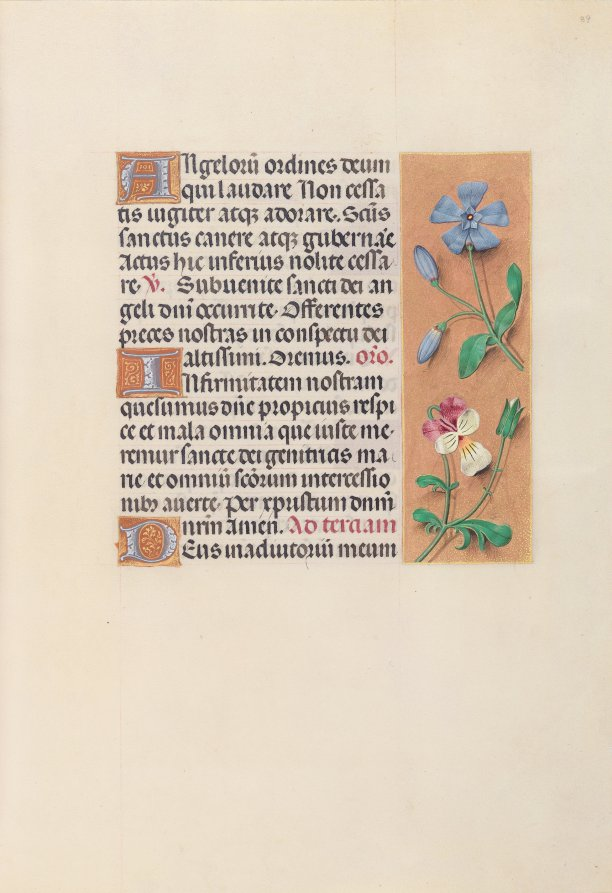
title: Hours of Queen Isabella the Catholic, Queen of Spain: Fol. 39r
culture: Flanders, Ghent and Bruges, late 15th century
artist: Master of the First Prayerbook of Maximillian (Flemish, c. 1444–1519)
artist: and Associates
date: c. 1500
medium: ink, tempera, and gold on vellum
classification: Bound Volume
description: This manuscript was illuminated by a circle of at least five highly organized manuscript painters active in the Flemish cities of Ghent and Bruges. The principal illuminator was Alexander Bening, who painted the majority of the book's miniatures. Manuscripts produced by this circle of artists are renowned for the decoration of their borders, which typically feature a rich variety of realistically-painted flowers, birds, and butterflies. This prayer book, called a book of hours, was intended not for a cleric, but for the private devotions of a lay person-in this case, Isabella the Catholic, Queen of Spain (1451-1504). Isabella's coat of arms embellishes the book's frontispiece. It is unlikely that the book was commissioned by the Queen herself; rather, she probably received it as a diplomatic gift from someone courting her patronage, perhaps Cardinal Francisco Jimenez de Cisneros. A Franciscan friar, Jimenez was dependent upon Isabella for his advancement, first to the post of Queen's confessor in 1492, and then to Archbishop of Toledo in 1495.